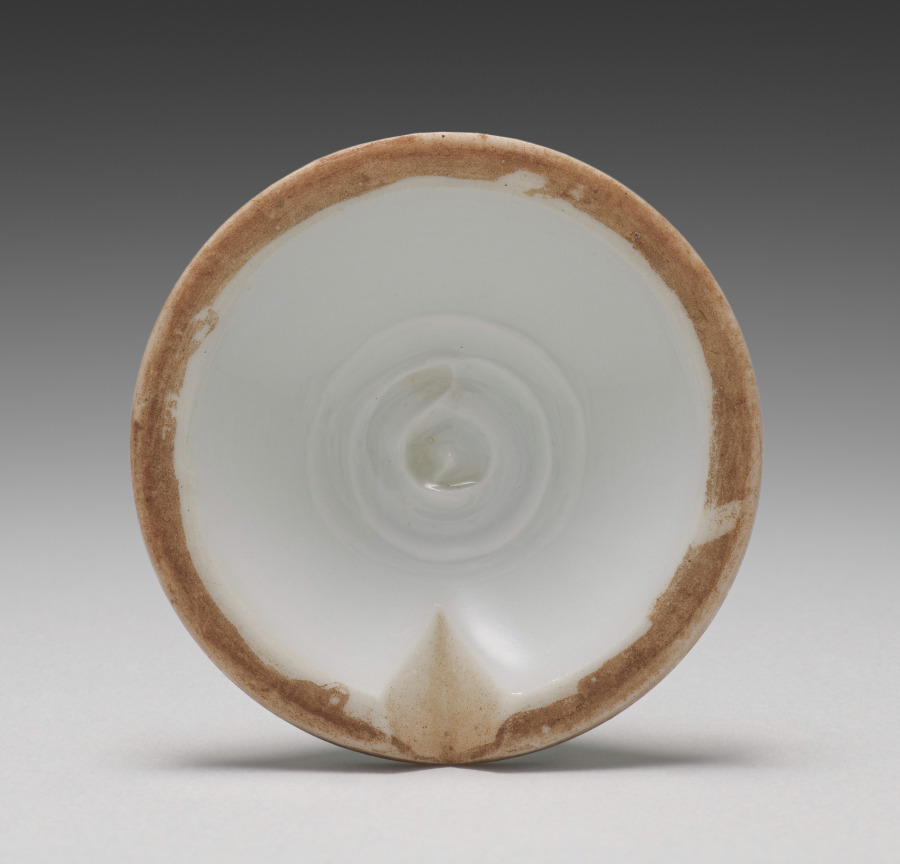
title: Lid for a Teapot with Pines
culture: Japan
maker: Seifū Yohei III (Japanese, 1851–1914)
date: 1893–1914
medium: Porcelain with underglaze blue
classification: Ceramic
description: Side-handled teapots known as kyūsu and hot water coolers, or yuzamashi, are essential components of sencha tea sets. The teapot is, of course, meant for steeping and serving the tea. Yuzamashi are used to cool boiled water to the ideal temperature for the type of tea to be brewed. This teapot has a pine in underglaze blue on each side. The tip of one of these pines reaches onto the tiny lid, and as with the trees on the Water Cooler with Pines, CMA 2022.163, the trunks are curvy ribbons with little definition. Considering the execution of their designs, one might imagine the pot and cooler to have been part of the same set.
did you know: This teapot with images of pines are among Seifū Yohei III’s designs painted in blue.